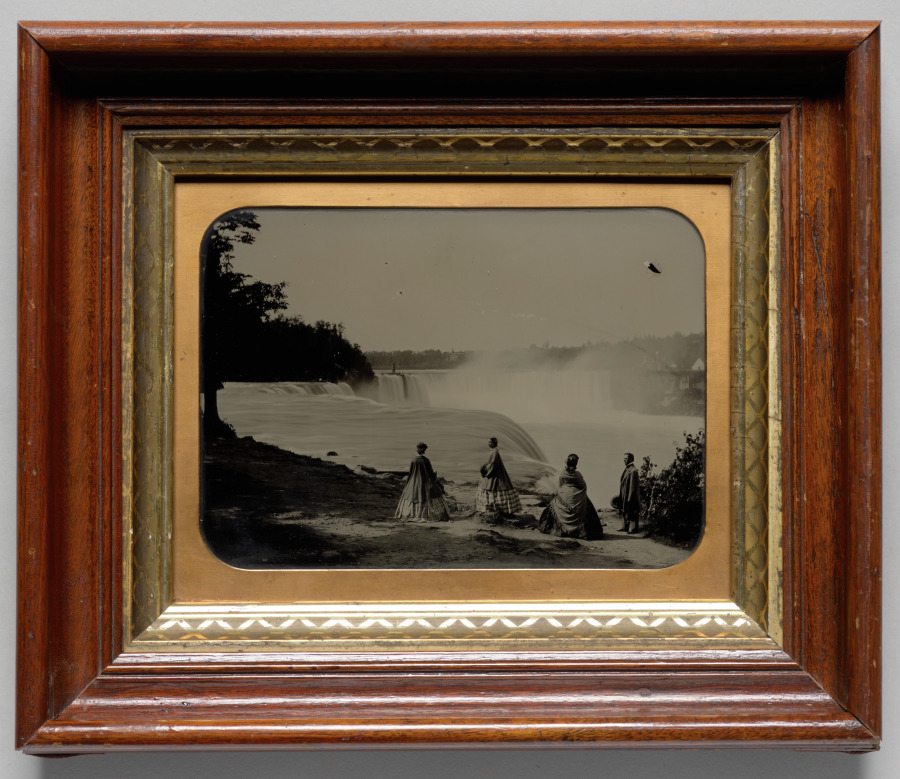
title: Niagara Falls with well-dressed group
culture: America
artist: Platt D. Babbitt (American, 1823–1879)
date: c. 1862–64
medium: ambrotype, whole plate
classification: Photograph